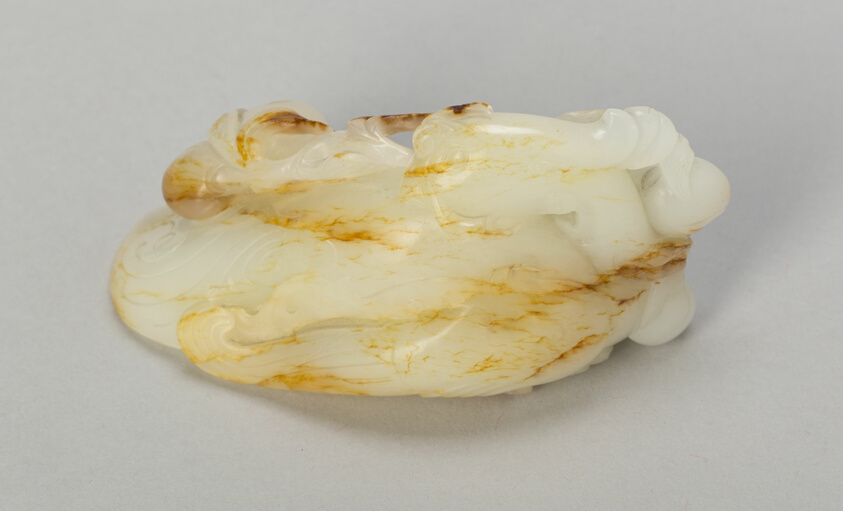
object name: Decorative Arts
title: Bird with Stylized Plumage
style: Chinese (culture or style)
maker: China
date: late Ming (1368–1644) or early Qing dynasty (1644–1911), 17th century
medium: Jade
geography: China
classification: jade; asian art; decorative arts